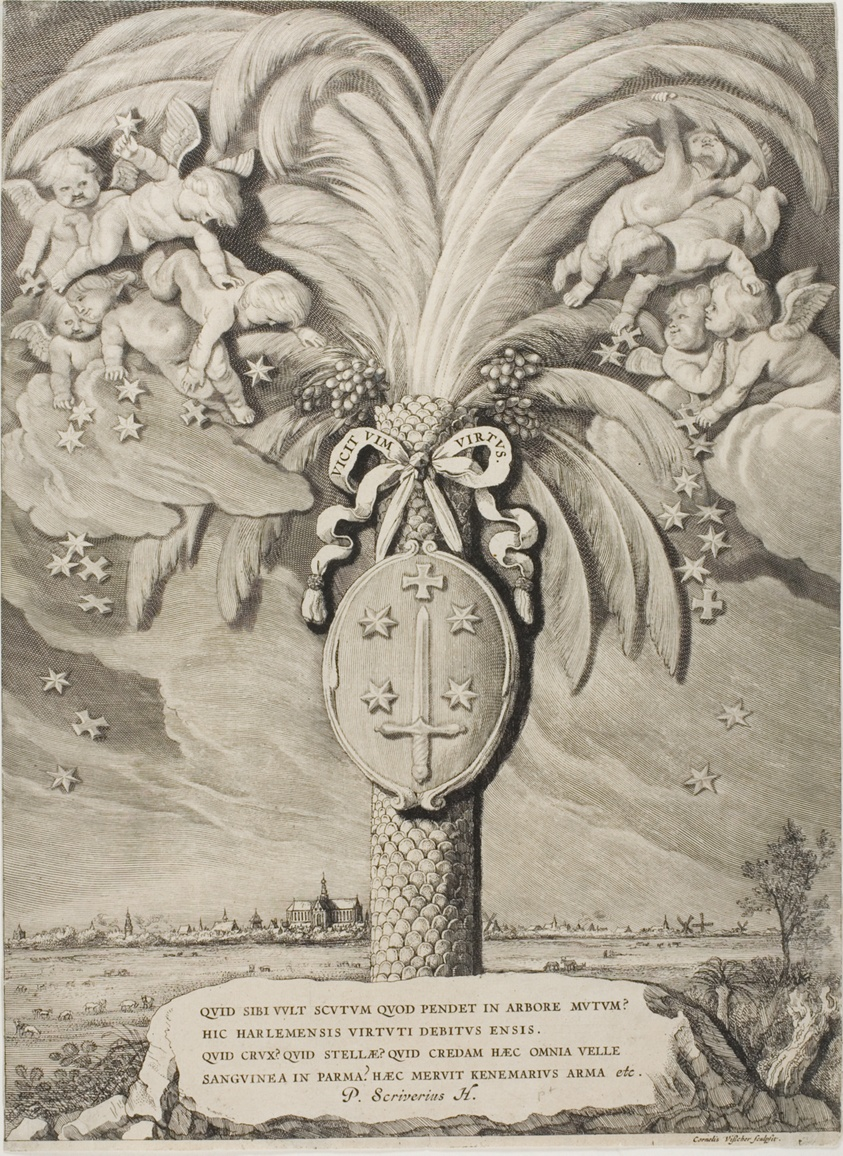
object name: Print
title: Coat of Arms of Haarlem, end page to Counts and Countesses of Holland, Zeeland and West-Frisia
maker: Cornelis Visscher (Dutch, c. 1629-1658)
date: 1650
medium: Etching and engraving on ivory laid paper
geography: Holland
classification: engraving; print; prints and drawing